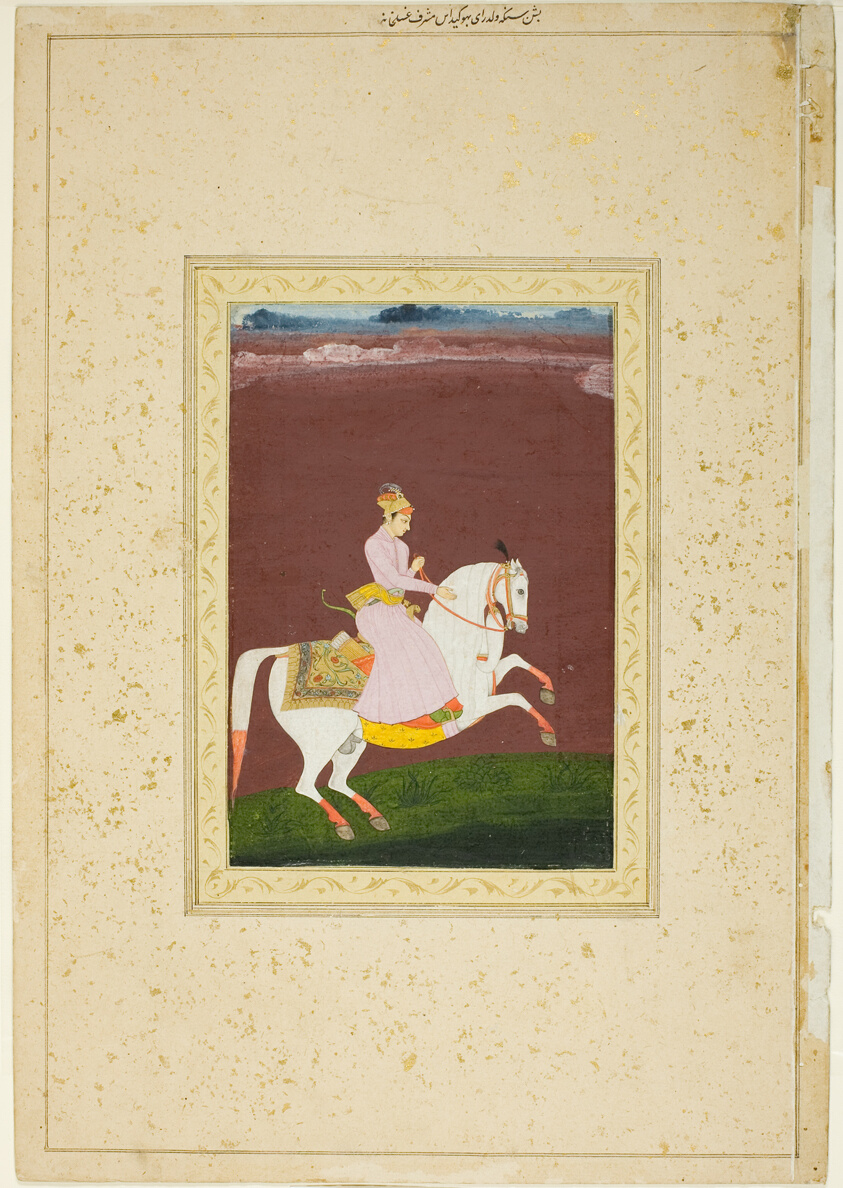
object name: Painting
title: A Young Prince on Horseback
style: South Asian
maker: India; Rajasthan, Jodhpur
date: c. 1720-1730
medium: Opaque watercolor and gold on paper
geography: India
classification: gouache; painting; asian art